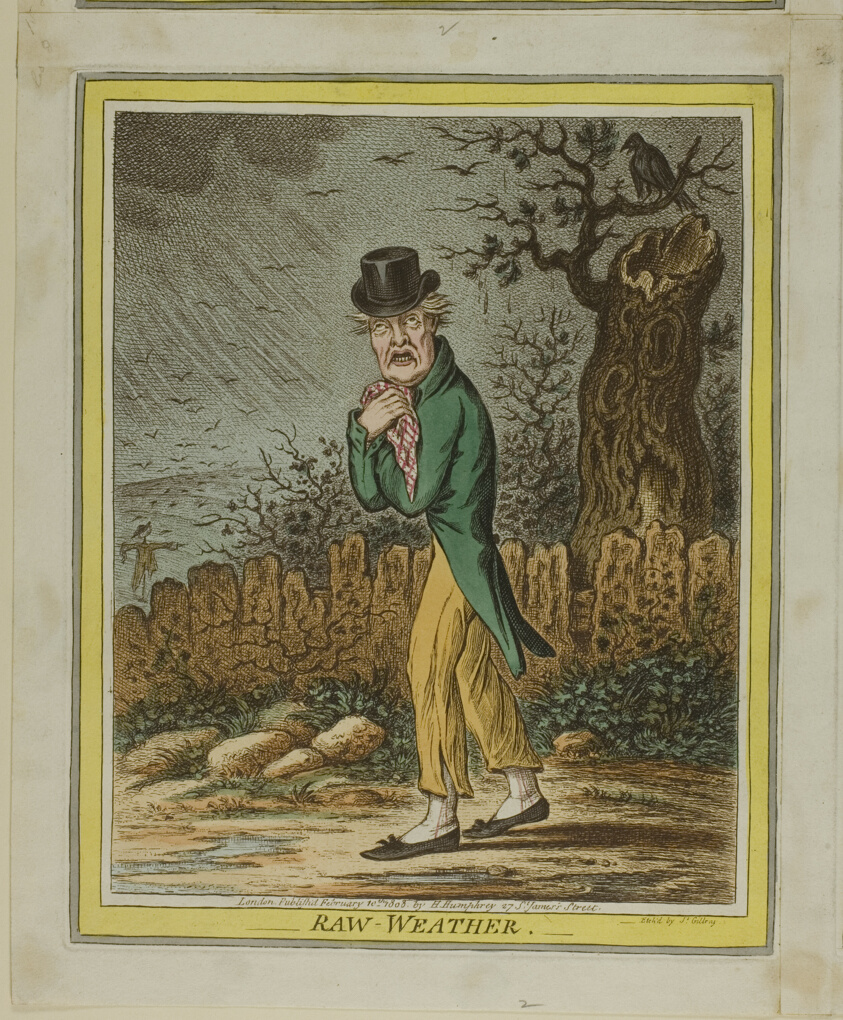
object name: Print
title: Raw Weather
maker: James Gillray (English, 1756-1815); published by Hannah Humphrey (English, c. 1745-1818)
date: published February 10, 1808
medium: Hand-colored etching on paper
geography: England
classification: etching; print; prints and drawing